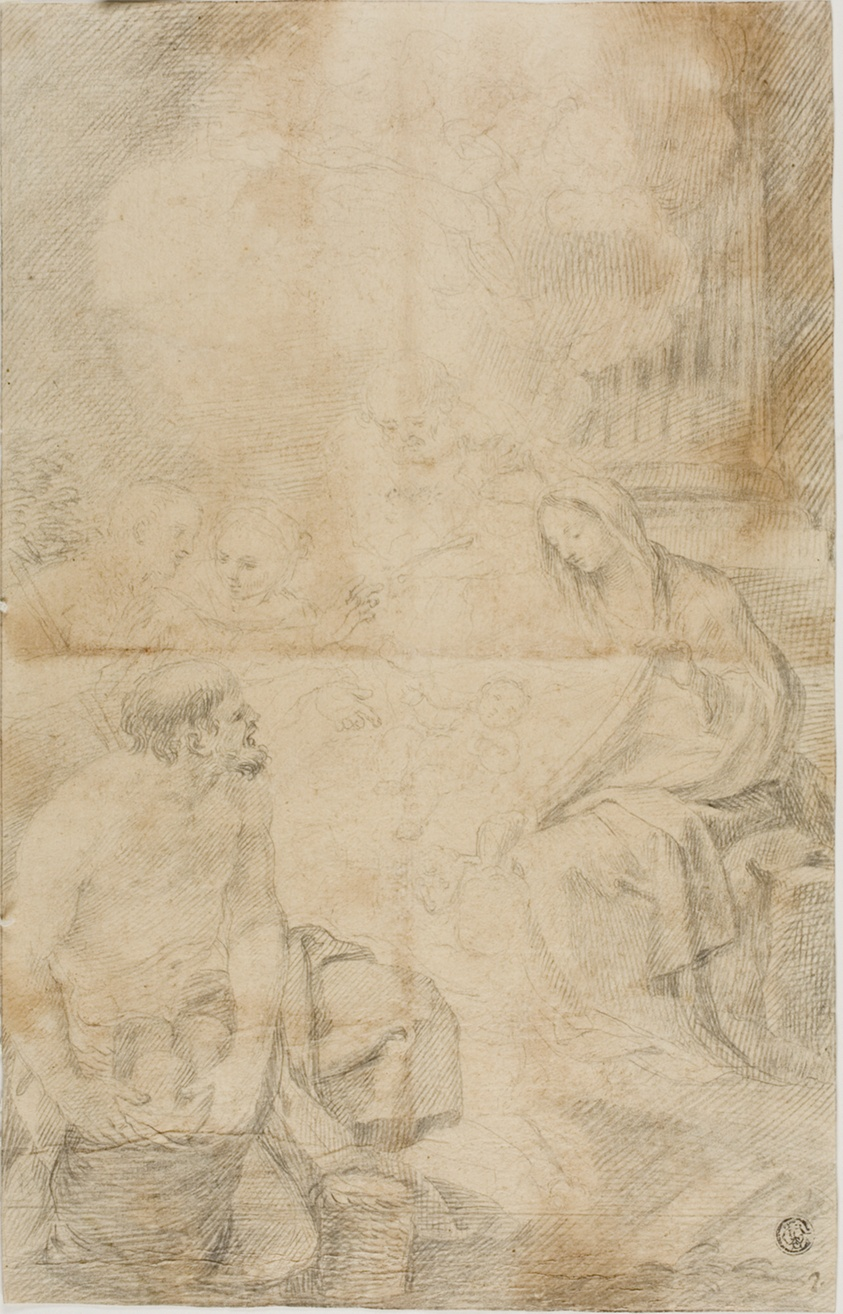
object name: Drawing and Watercolor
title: Adoration of the Shepherds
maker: Possibly Donato Creti (Italian, 1671-1749); or Guido Reni (Italian, 1575-1642); possibly after Pietro da Corton (Italian, 1596-1669)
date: c. 1700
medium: Black chalk on tan laid paper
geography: Italy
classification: graphite; drawings (visual works); prints and drawing